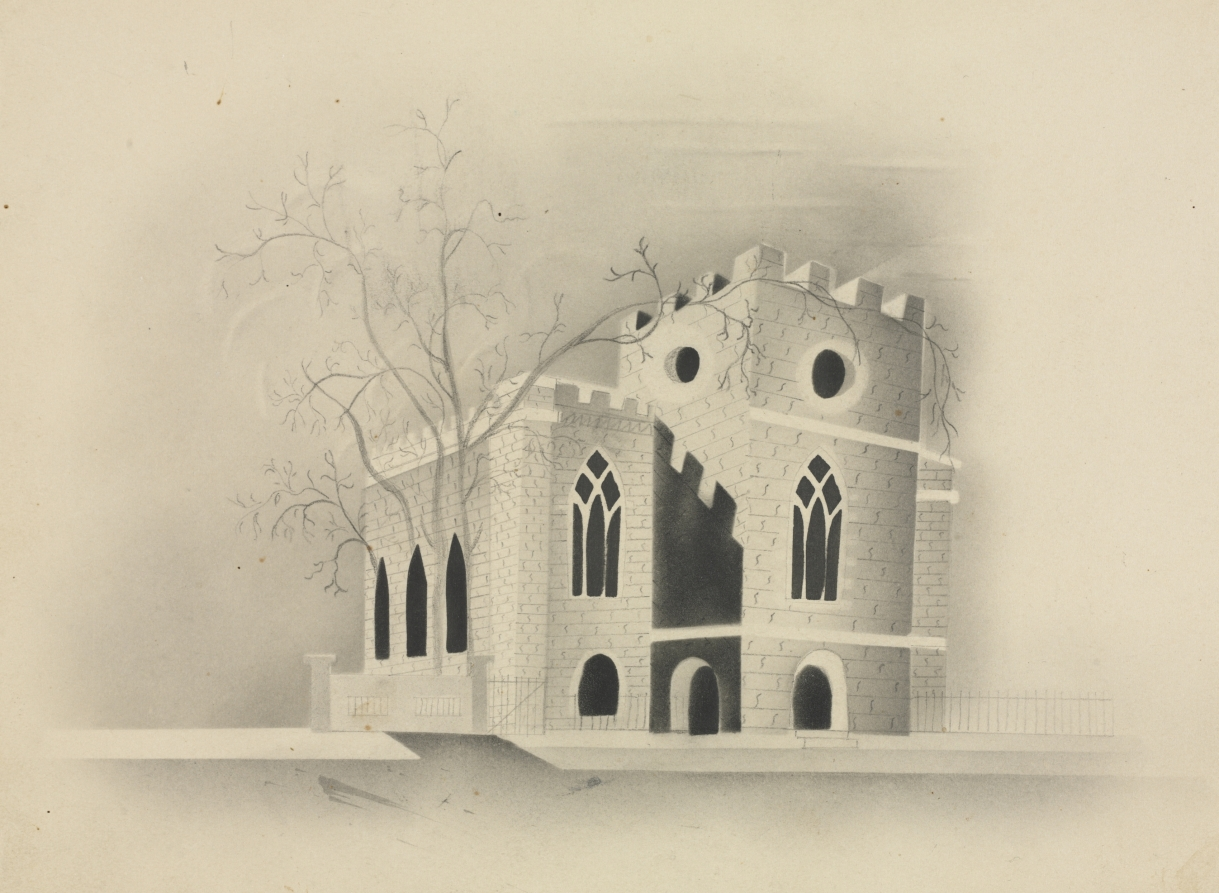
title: A Gothic Church by Moonlight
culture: America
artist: Mary Altha Nims (American, 1817–1907)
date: 1840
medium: pencil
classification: Drawing